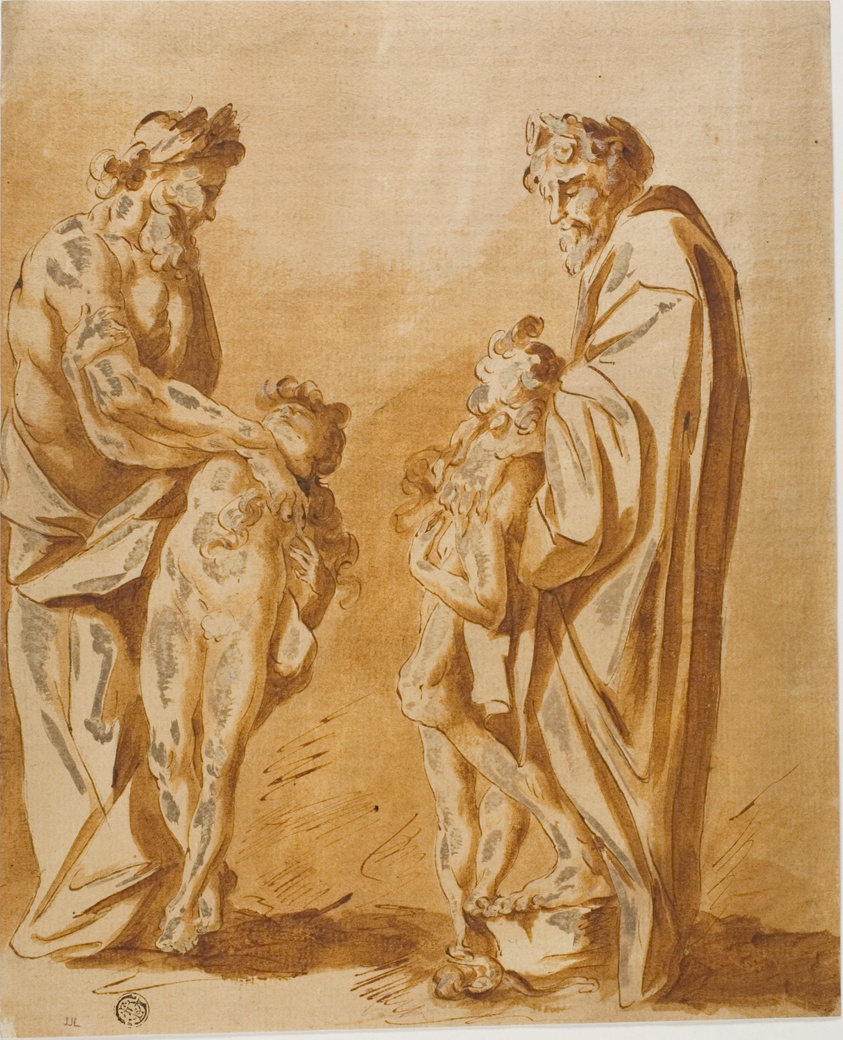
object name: Drawing and Watercolor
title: Two Views of an Antique Statue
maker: Unknown Artist; French or Italian, 1500-1699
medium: Pen and brown ink, with brush and brown wash, heightened with lead white (discolored), on cream laid paper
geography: France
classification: ink or chalk wash; drawings (visual works); prints and drawing